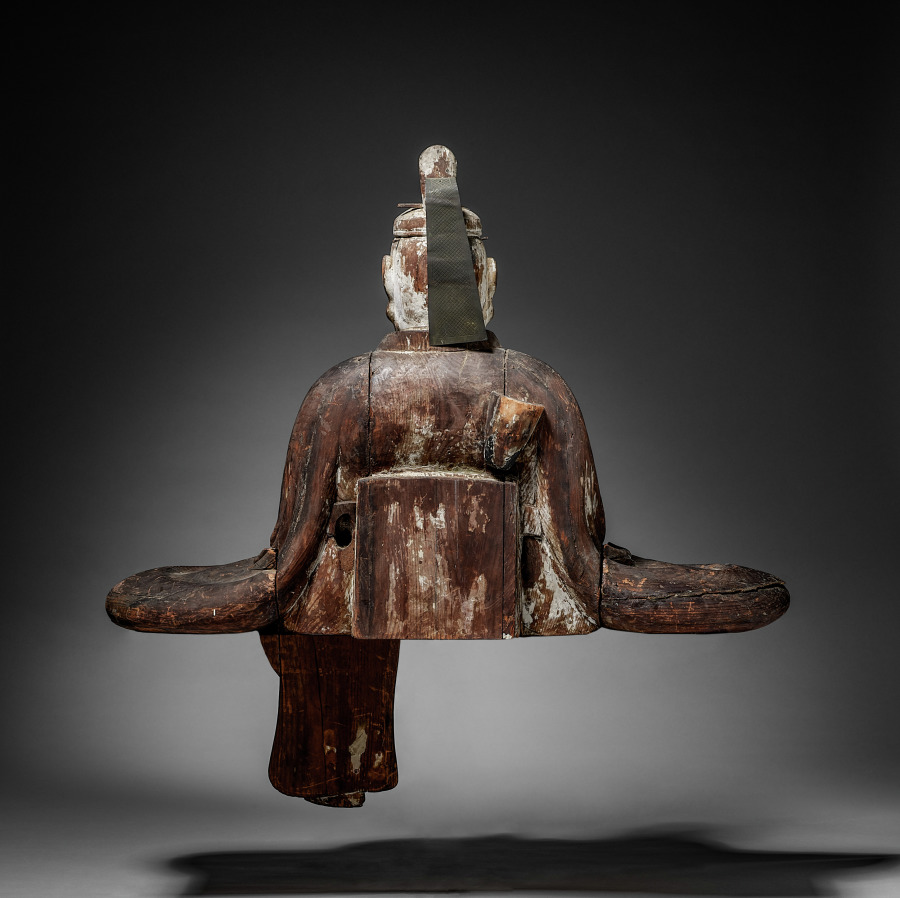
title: One of a Pair of Guardian Figures (Zuishin)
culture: Japan, Muromachi period (1392–1573) to Edo period (1615–1858)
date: c. 1560–1625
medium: Japanese cypress (hinoki) with traces of color; crystal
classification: Sculpture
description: Sculptors carved these two figures to look like members of the guard who protected the Japanese aristocracy in the 10th to 12th centuries. The pair belong in the roofed gate of a Shinto shrine. Their role was to embody the divine protectors of the deities, or kami, residing at the shrine. Their inset crystal eyes make them appear vigilant.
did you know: Some Japanese sculptors used to specialize in inset crystal eyes.